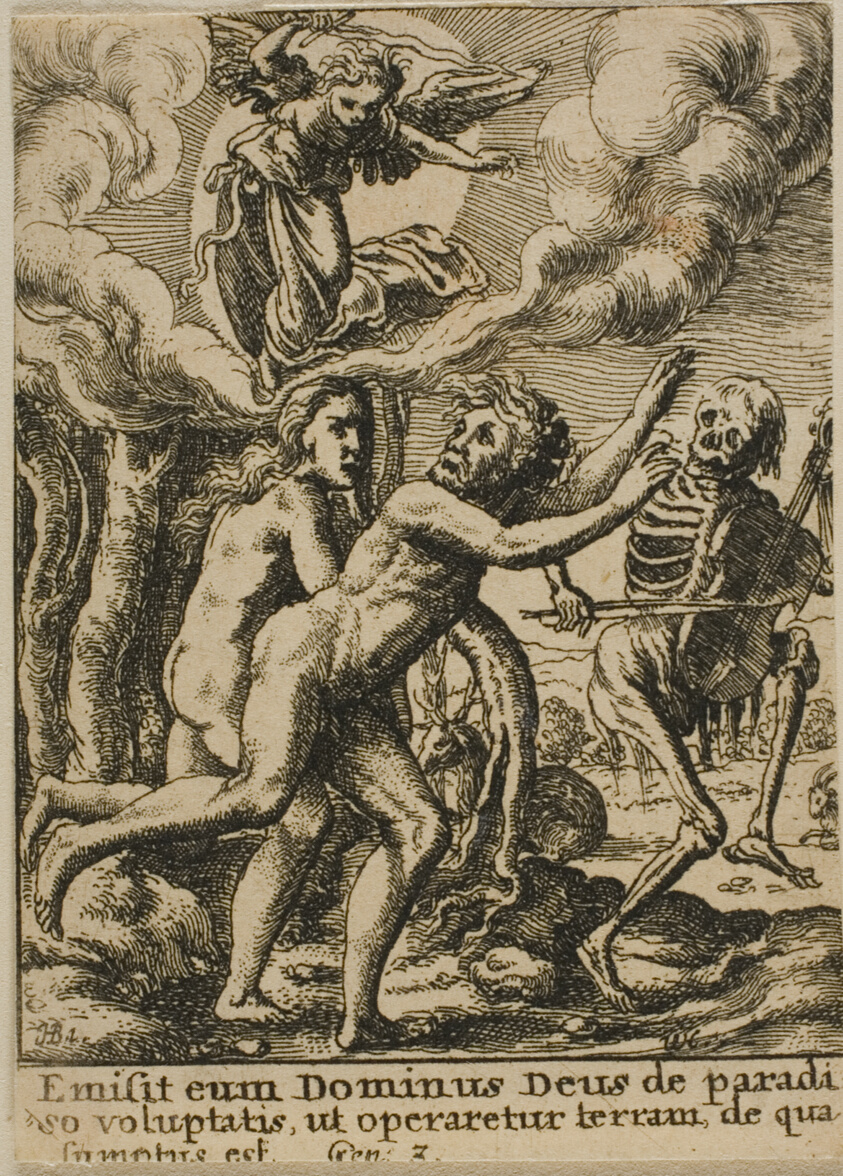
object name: Print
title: Expulsion from Paradise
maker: Wenceslaus Hollar (Bohemian, 1607-1677); after Hans Holbein the younger (German, c.1497-1543)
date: 1651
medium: Etching on ivory wove paper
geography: Bohemia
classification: etching; print; prints and drawing